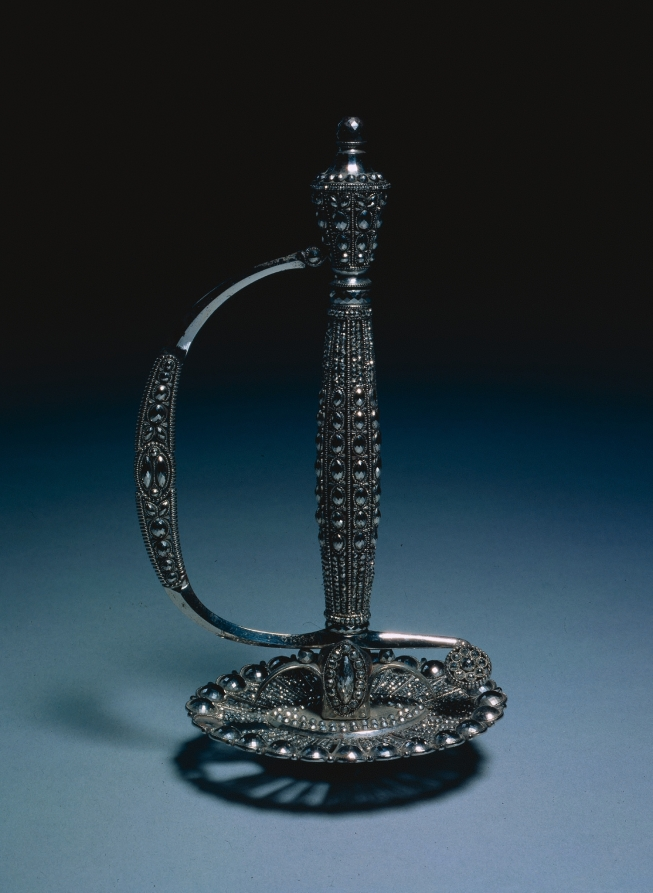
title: Hilt from a Court Sword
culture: England, late 18th Century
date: c. 1790–1800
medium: polished steel, pierced and inset with faceted steel beads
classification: Arms and Armor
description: The entire hilt is made of polished steel, with faceted steel beads of different sizes arranged in rows and rosettes to give the impression of a "jeweled" hilt. This was an object of great luxury to be worn only with a gentleman's formal attire at court.